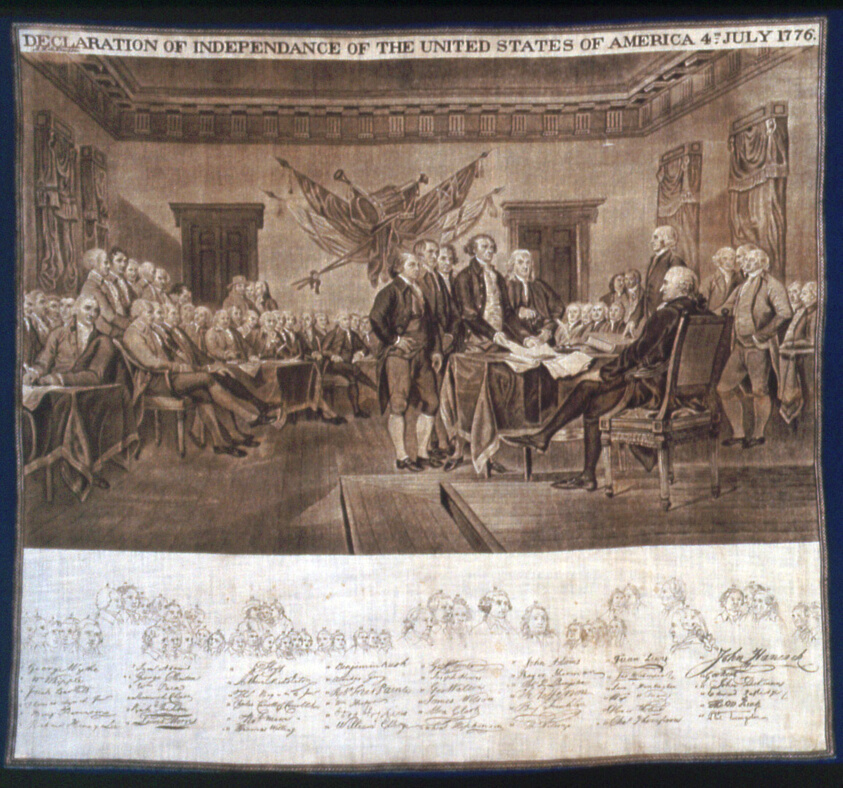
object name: Textile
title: Handkerchief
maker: After a painting by John Trumbull (American, 1756–1843); United States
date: c. 1876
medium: Cotton, plain weave; roller and engraved roller printed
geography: United States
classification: textile; weaving - printed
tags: propaganda